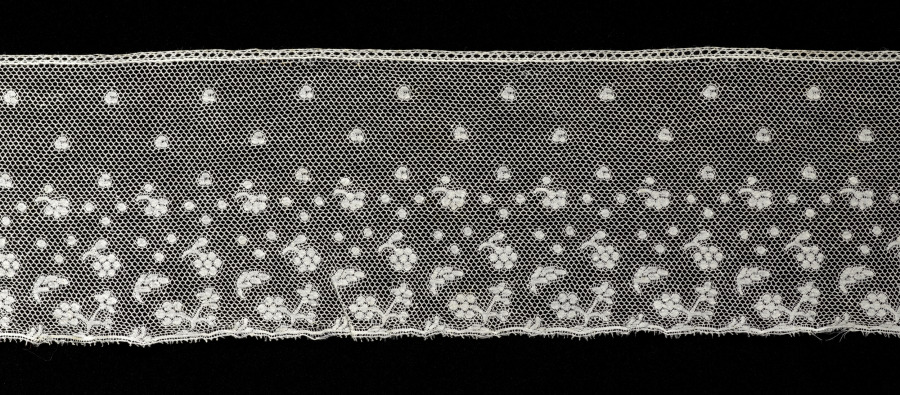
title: Fragment of Lace Edging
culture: France, Valenciennes?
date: 1780–1820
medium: Bobbin lace (Valenciennes)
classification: Lace